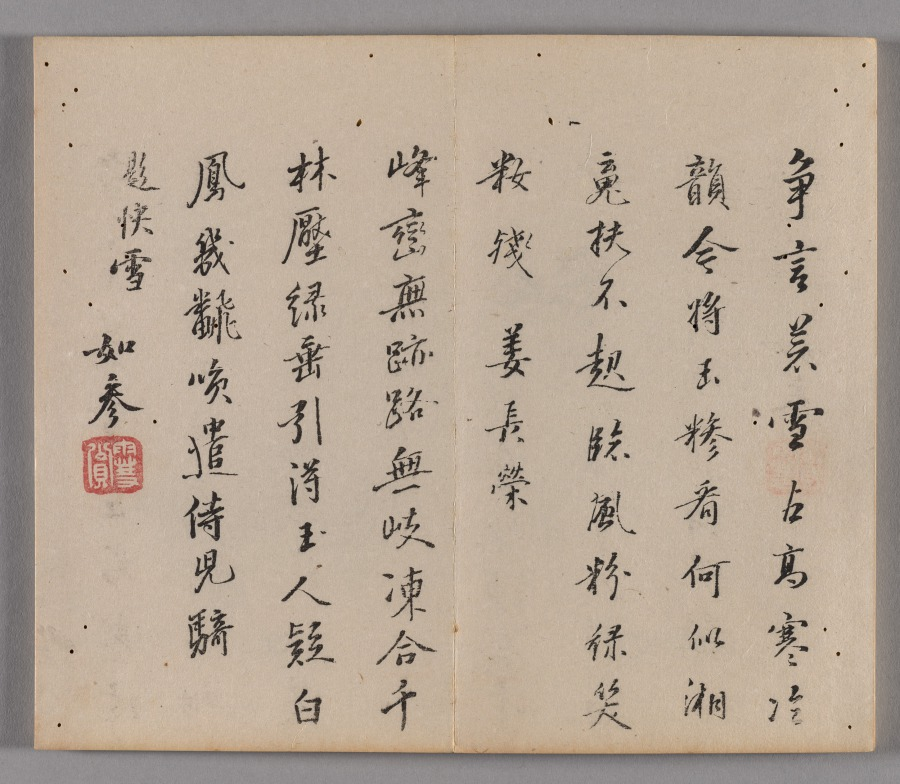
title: Ten Bamboo Studio Painting and Calligraphy Handbook (Shizhuzhai shuhua pu): Bamboo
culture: China, Qing dynasty (1644-1911)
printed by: Hu Zhengyan (Chinese, c. 1584–1674)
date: 1633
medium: Woodblock-printed book; ink and colors on paper; first edition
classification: Print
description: Color printing reached a level of perfection in the early 1600s, as seen in this Ten Bamboo Studio Collection of Calligraphy and Painting and the Mustard Seed Garden Manual of Painting (printed 1679 and 1701). The painterly quality, precision in registering (aligning) the woodblocks, and harmonious colors made them the most successful color print editions in Chinese history. Both editions were printed and compiled in Nanjing, spread nationwide, and had a great impact on the arts in Japan and Korea.